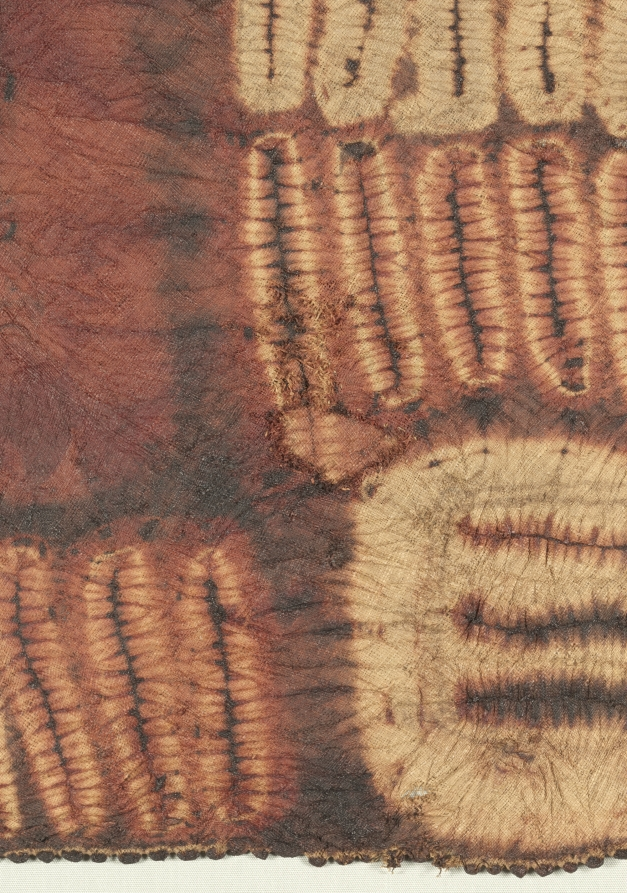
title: Man's Garment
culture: Africa, West Africa, Côte d'Ivoire, Dida-style weavers and dyers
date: possibly early 1900s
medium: Raffia palm fiber (Raphia ruffia or R. vinifera) and dye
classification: Textile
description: Displayed flat to highlight its designs and preserve its delicate fibers, this wrapper was meant to drape around the body. An elite man wore it with one corner over a shoulder, the knotted fringe skimming his ankles. The garment gained its earth-toned geometric patterns through plangi, a knot-and-twist resist dyeing technique; each color is applied in a different dye bath, from lightest to darkest. While their patterns are unique, these garments reflect regional influence: Dida women likely learned hand interlacing from Liberian Kpelle weavers. Such garments were given as gifts or worn on special occasions, at least into the 1990s.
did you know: The tying of fabric during the making of this garment gives its surface a distinctively "crinkled" texture.